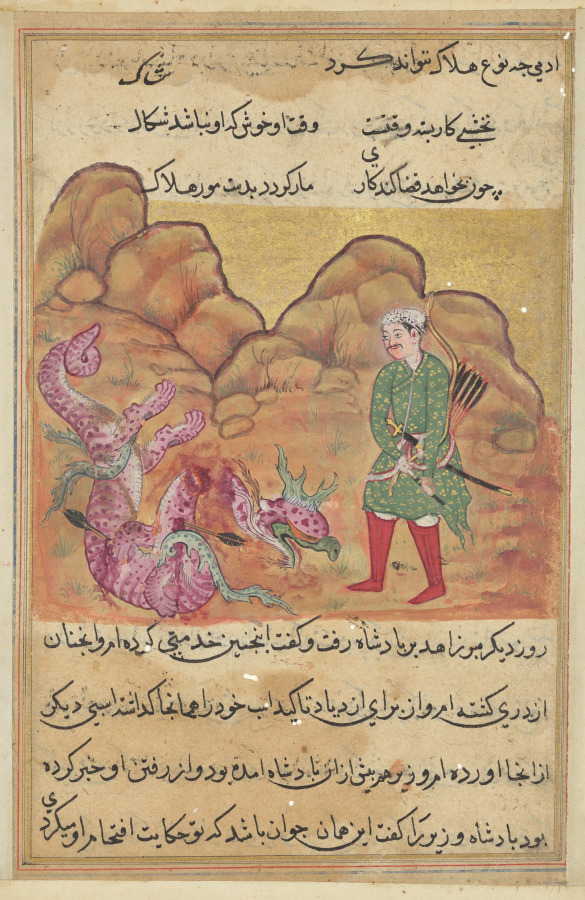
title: The son of the pious man slays the dragon, from a Tuti-nama (Tales of a Parrot): Fifty-second Night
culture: Mughal India, court of Akbar (reigned 1556–1605)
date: c. 1560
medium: gum tempera, ink, and gold on paper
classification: Painting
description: The mangled body of the dragon lies at the young man’s feet. Two poisoned arrows protrude from its side. The man has killed the dragon in hopes of marrying the king’s daughter. Although many warriors and brave men have failed at this task, the young man succeeds with ease.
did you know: The white holes in this page are from insect damage.